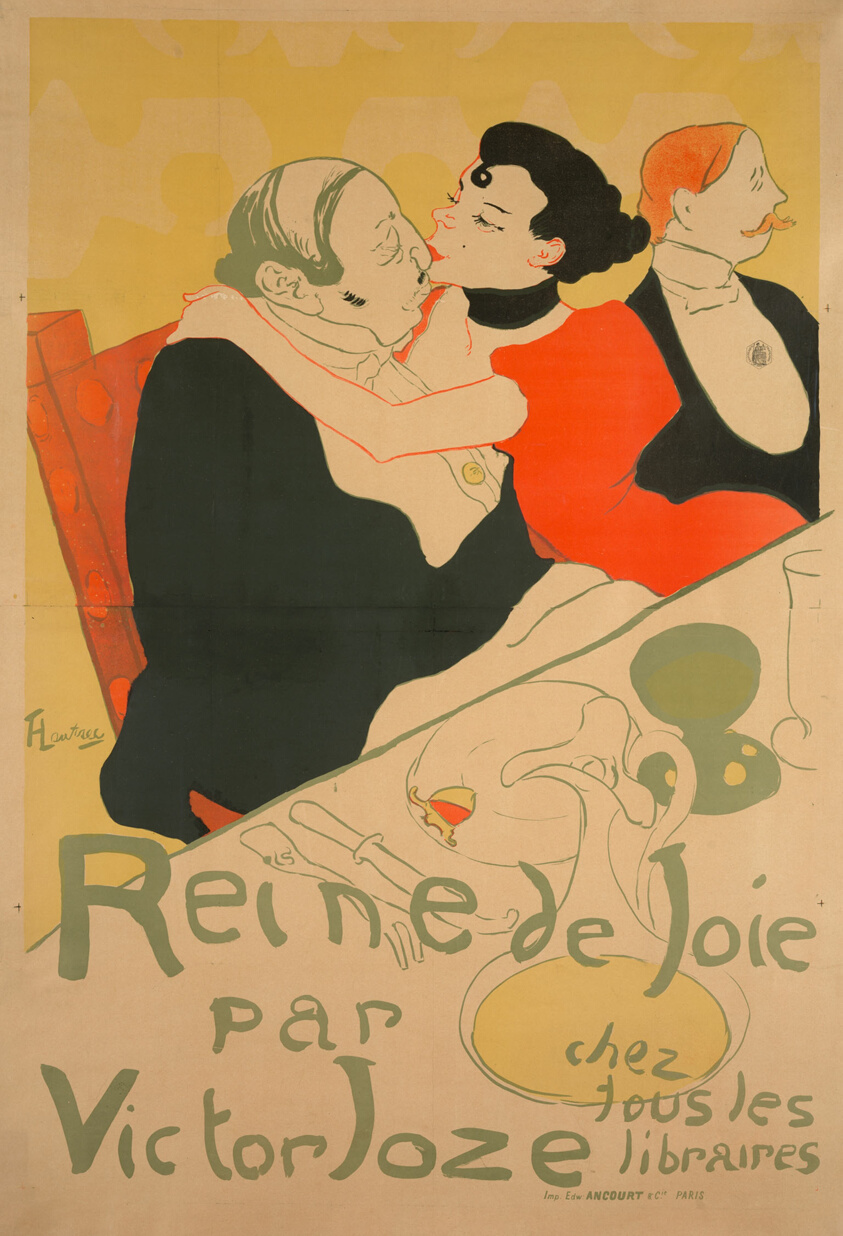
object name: Print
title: Reine de Joie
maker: Henri de Toulouse-Lautrec (French, 1864-1901); Victor Jose (French, 19th-20th century)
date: 1892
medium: Color lithograph on tan wove paper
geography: France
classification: lithograph; poster; print; prints and drawing